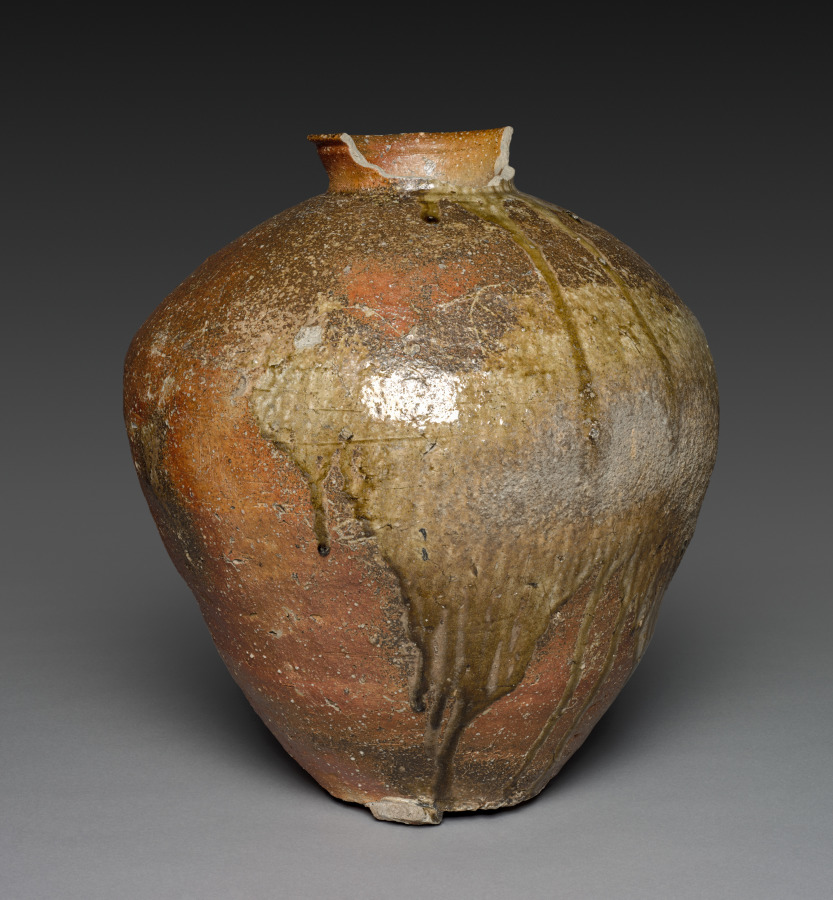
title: Storage Jar (Tsubo)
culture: Japan, Muromachi period (1392–1573)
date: 1400s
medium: Stoneware with natural ash glaze (Shigaraki ware)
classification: Ceramic